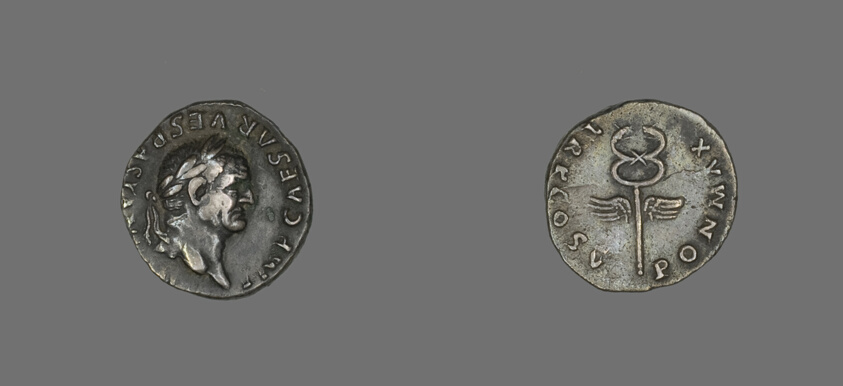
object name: Coin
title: Denarius (Coin) Portraying Emperor Vespasian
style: imperial (roman), ancient, roman (ancient, style or period)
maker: Roman, minted in Rome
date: 74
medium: Silver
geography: Roman Empire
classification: coin; ancient art; struck